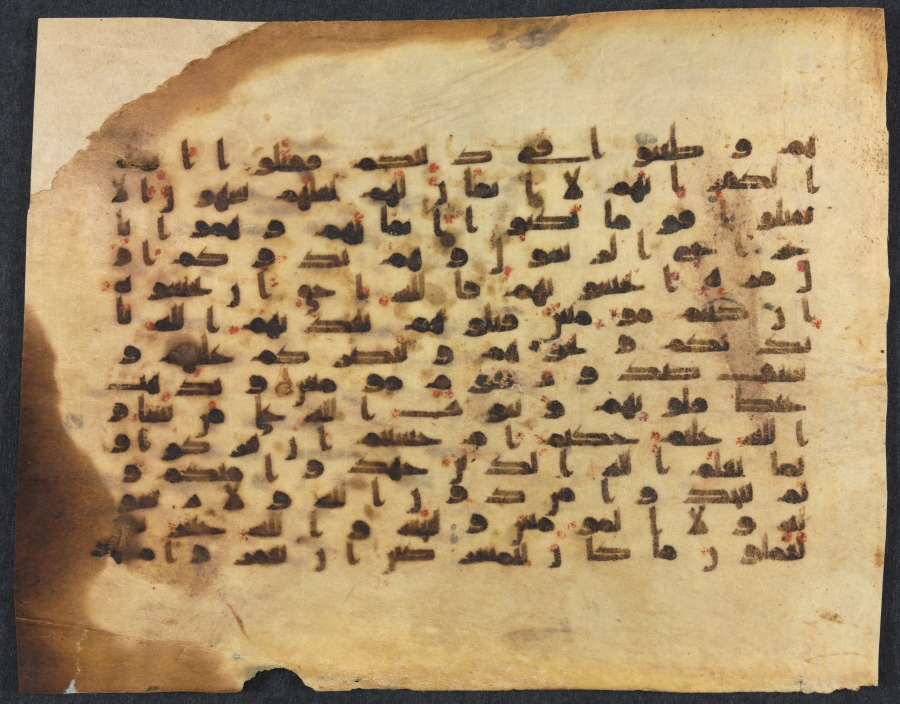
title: Qur'an Manuscript Folio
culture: Egypt?, Abbasid Period, 9th century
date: 800s-900s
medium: ink, gold, and color on parchment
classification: Drawing